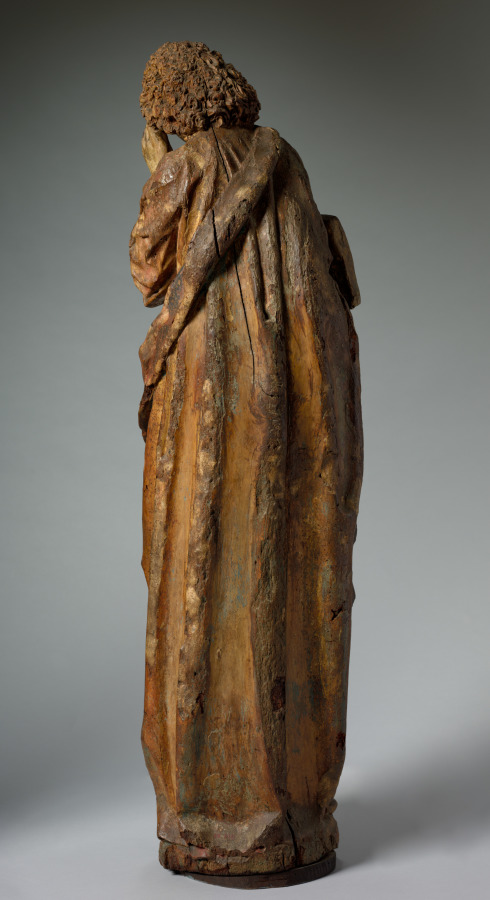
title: Saint John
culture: France, 15th century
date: 1450–1499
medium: wood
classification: Sculpture